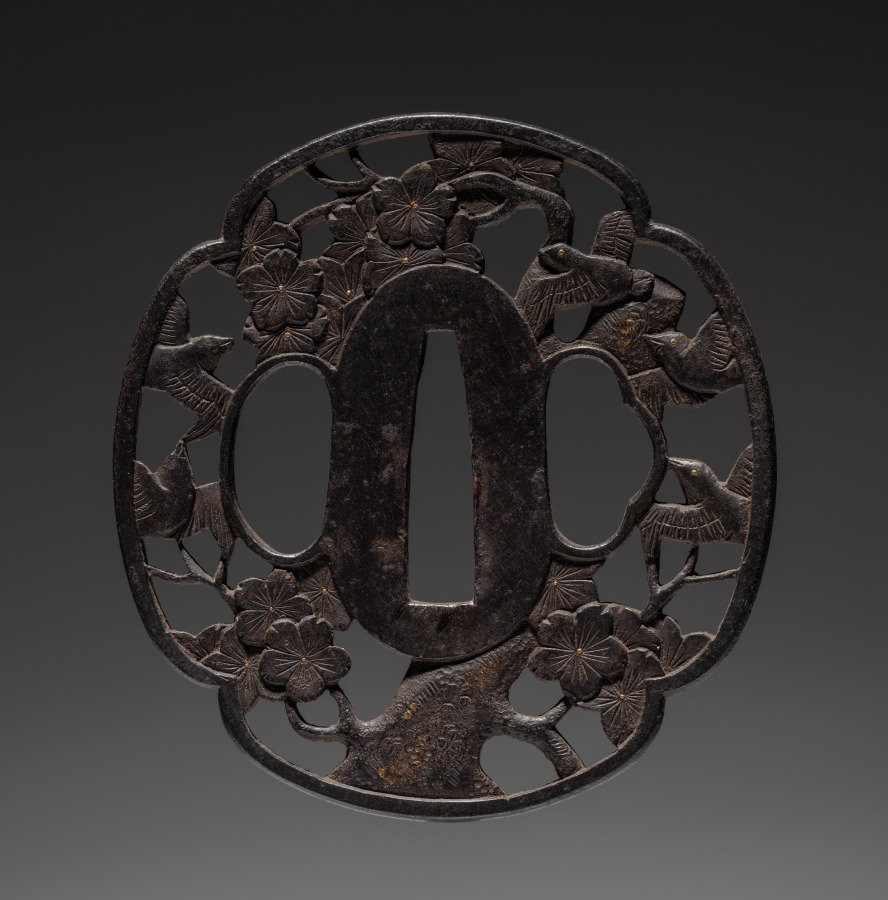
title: Sword Guard (Tsuba) with Birds in Cherry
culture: Japan, possibly Edo period (1615-1868)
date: c. 1615–1868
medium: iron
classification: Arms and Armor